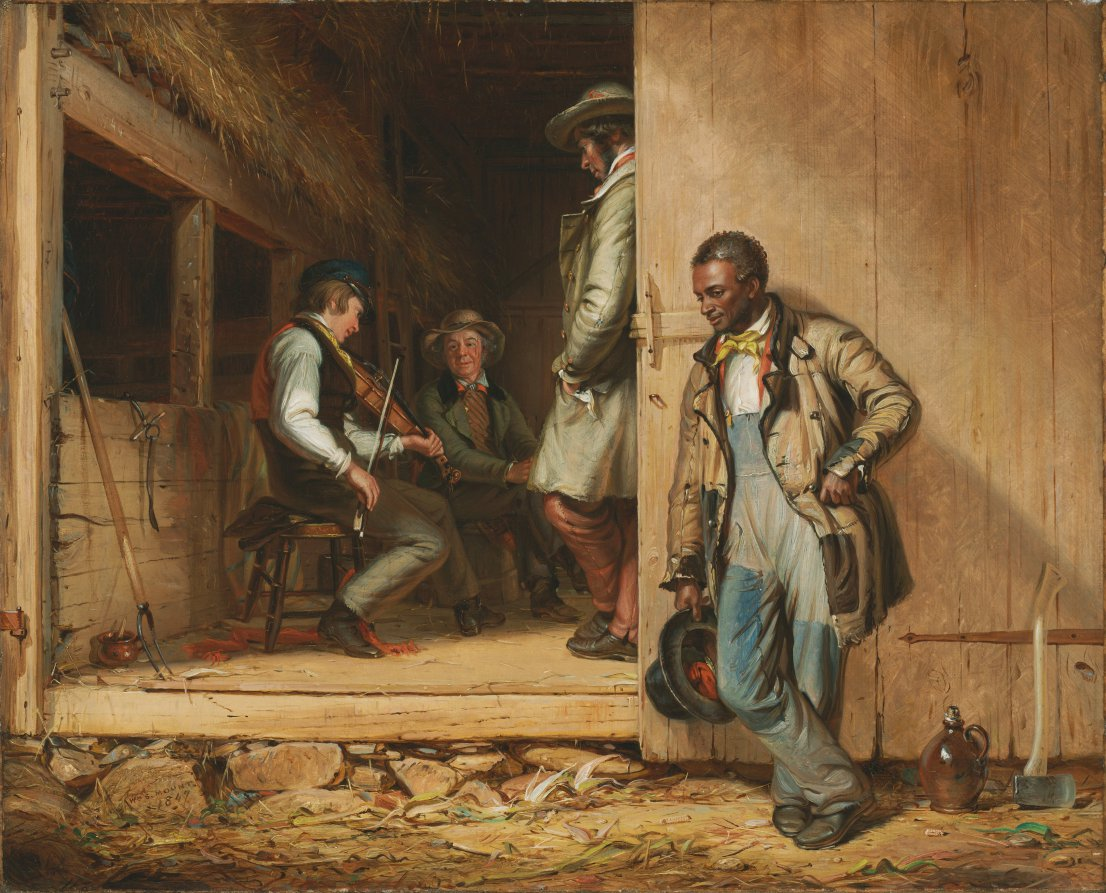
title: The Power of Music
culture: America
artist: William Sidney Mount (American, 1807–1868)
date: 1847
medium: oil on canvas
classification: Painting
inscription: signed lower left: Wm S. MOUNT. / 1847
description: Set in rural Long Island before the Civil War, Mount's complex painting presents an African American laborer listening intently to a fiddle tune enjoyed by white men. While a love of music unites the figures in a bond of shared humanity, the two races occupy different spaces--one inside, one outside, both separated by a barn door--effectively symbolizing the pronounced divisions in America at the time.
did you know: Mount was an accomplished fiddle player and even patented a new design for the instrument.